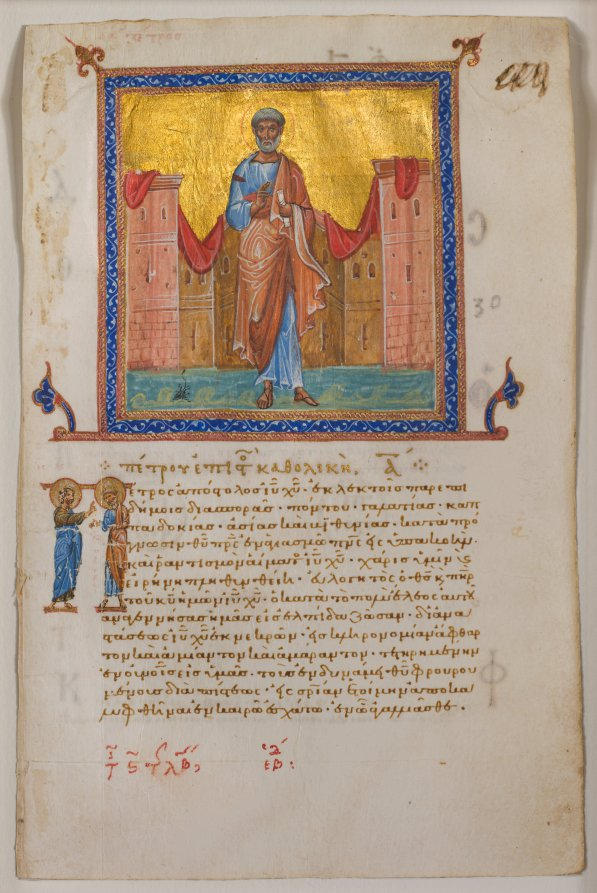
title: Leaf from a Greek Psalter and New Testament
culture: Byzantium, Constantinople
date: 1084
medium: ink, tempera, and gold on vellum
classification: Manuscript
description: Covering half the page of this leaf is a miniature representing the Apostle Peter. Below are 13 lines of Greek text introduced by the Greek letter pi which is created by figures of Christ and Saint Peter. The leaf comes from a combined psalter (book of sacred songs) and the New Testament. In its design, it shows close parallels with examples that were created in Constantinople workshops.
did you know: Imported illuminated manuscripts were important in spreading the Byzantine style throughout Western Europe.